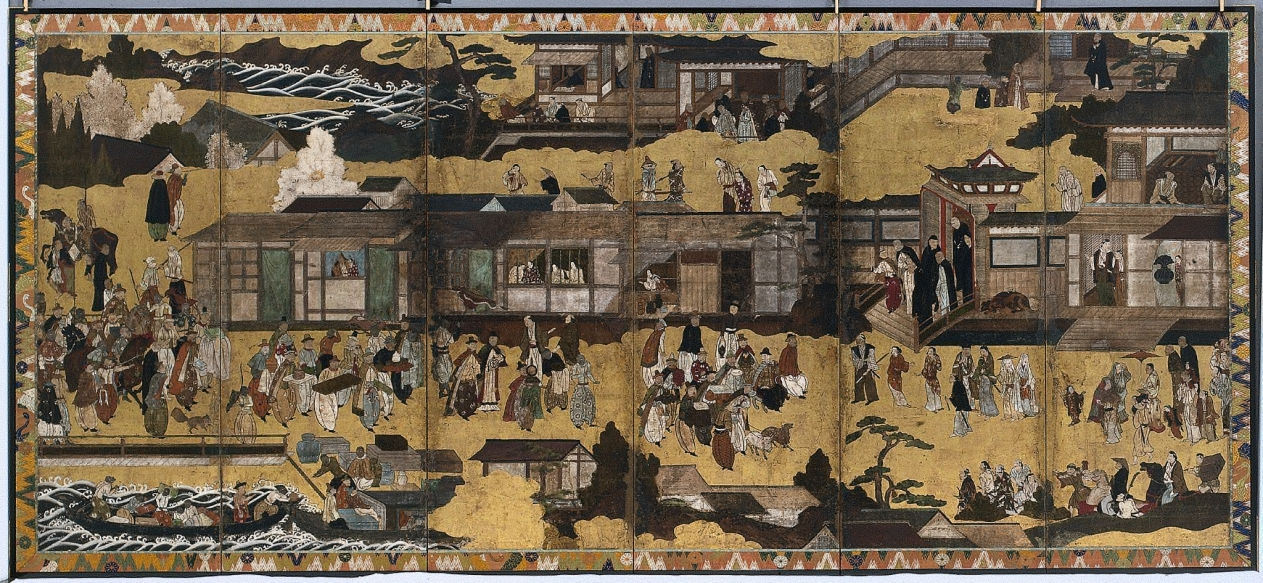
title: Arrival of the "Southern Barbarians"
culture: Japan, Momoyama period (1573–1615)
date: c. 1600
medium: One of a pair of six-panel folding screens; ink, color, and gold on paper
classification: Painting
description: This screen and its corresponding screen show Portuguese merchants arriving in Japan, having crossed the oceans in their large ship with a multinational crew. The Portuguese were known in Japan as the “Southern Barbarians” because they arrived from the south and their customs and manners were unfamiliar to the Japanese, who had not encountered anyone from Europe until their first appearance in 1543. In 1639, the Portuguese were forced out of Japan, mainly owing to internal difficulties caused by their Catholic missionaries, but they were a major conduit for both objects and ideas from Europe for nearly 100 years.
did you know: Europeans were called "Southern Barbarians" because their ships arrived in Japan from the south.